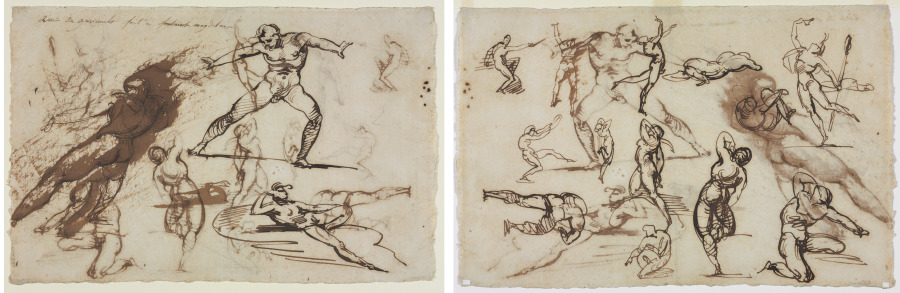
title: Sheet of Sketches (recto and verso)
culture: France, 19th century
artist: Théodore Géricault (French, 1791–1824)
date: 1819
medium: pen and brown ink on ivory laid paper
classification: Drawing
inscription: inscribed, in brown ink, at upper left: dessin de gericault fait à fontain la magdelaine; watermark, at center: scallop shell (possibly J. Berger or J. Bouchet)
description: The inscription at the upper left of the sheet states that Géricault executed these studies at the spring of the Magdelaine, near the forest of Fontainebleau, which he visited in 1819. The male figures closely resemble the earlier studies he made while in Italy of peasants during horse races at annual Roman carnivals. Here, men struggle to keep control of their unseen animals during the moments before the race. The verso female figures, visible though the paper, derive directly from Pompeiian paintings of bacchanals, or revelers participating in festivals honoring Bacchus, the god of wine.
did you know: Géricault died at a young age and had a professional career lasting only just over a decade.